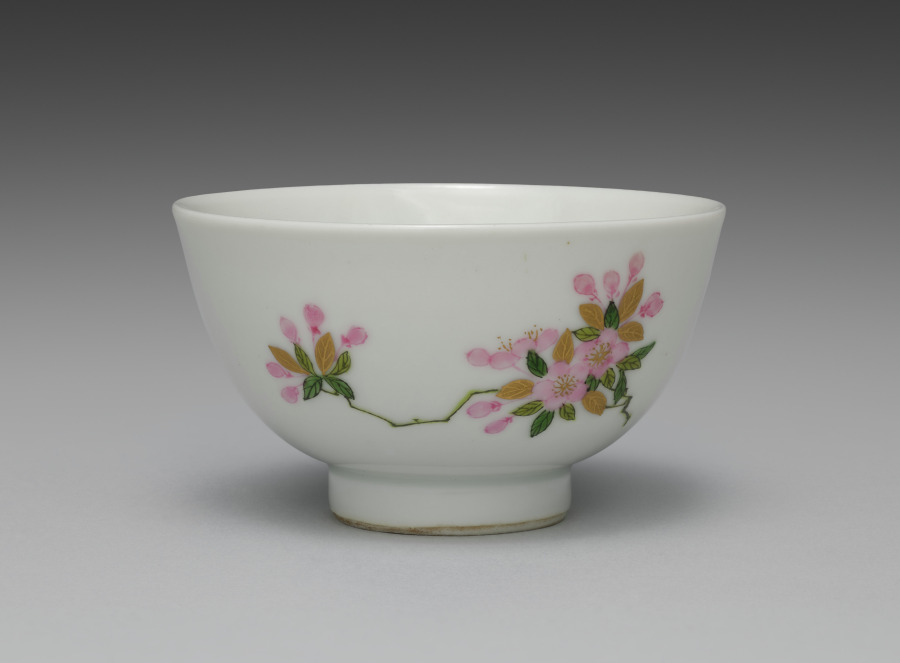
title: Teabowl from Teabowls with Peony and Crabapple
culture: Japan, Meiji period (1868–1912)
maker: Seifū Yohei III (Japanese, 1851–1914)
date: 1893–1914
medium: One from a set of five teabowls; porcelain with underglaze and overglaze color enamels and gold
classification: Ceramic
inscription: 清風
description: Overglaze color enamels are generally called iro-e (literally “color picture”) in the terminology customarily used for porcelain decoration of the Edo period. This set of teabowls is a fine example of Yohei III’s skilled use of the technique, which is identified on this set’s box lid with the alternate phrasing “porcelain with color painting” (jisaiga). Distinct from the way overglaze colors were used in Kakiemon ware from Arita, his designs and applications show a consciousness of porcelain decoration of the Qing dynasty. Here, he combines Chinese models with a sensibility taken from Kyoto ware precedents, including painting with powdered gold (kinrande). The colors used in the bowls are as follows: blue, black, gold, white, light green, green, and pink. The blue appears only inside the footring, as a double band of underglaze color. The black iron, used for stems and leaf veins, is painted over the glaze. The gold, also painted over the glaze, is used for leaves and the centers of flowers, for solid, glossy lines defining detail, or as a semimatte ground. The white of the peony flower is built up to a low relief over the glaze. Yohei has incised lines of varying widths into the pigment, carving away to the bowl’s surface, to differentiate individual petals and their rippled shapes. The light and dark greens, as well as the pink, are painted over the glaze. Of note is how Yohei has first used thinly applied lines of light green to draw the plum branch before applying the opaque iron black. For the plum buds and flowers, he has used a diluted pink with an opaque pink for outline, both over the glaze. In his later works, Yohei used pink both over and under the glaze in a manner similar to underglaze blue, and it can be challenging in some cases to discern which technique he has used. A lidded container in a private collection has a similar design but is augmented with the inclusion of white and purple magnolia blossoms. In contemplating the original decorative program of a set, of which these teabowls may have been a part, it is worth considering that perhaps not all objects included the full range of motifs. In such cases, the composition of the individual object may be best understood within the context of the extended ensemble. Here, the delicate pink plum on one side of the bowl seems slightly unbalanced with the bold white peony on the other, but when seen with other objects with the magnolia and its additional colors and shapes, it is possible to imagine a set with a complex, balanced design across multiple pieces.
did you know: Because four is considered an unlucky number, it became customary to assemble groups of guests of five or multiples of five.